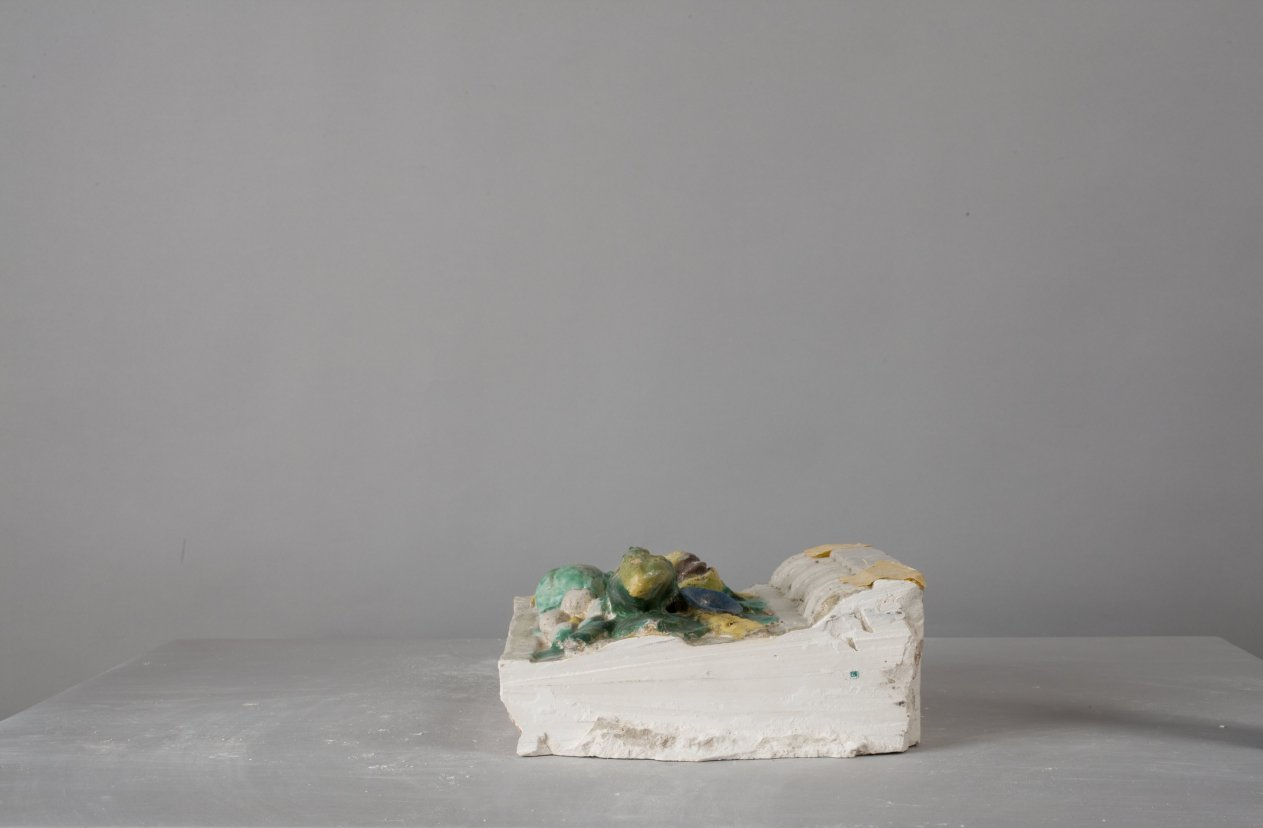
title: Fragment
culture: Italy, Florence, 16th century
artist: Benedetto Buglioni (Italian, 1461–1521)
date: c. 1900–1910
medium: glazed terracotta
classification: Sculpture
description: The Madonna sits upon a throne with the Christ Child standing on her knee. He is steadied by his mother, turning delicately to grasp the Virgin's robe for support. On the left is St. Francis, identified by his stigmata. On the right, St. Anthony Abbot is identified by his monk's robe and T-shaped walking stick. The brown robes of the saints, the purple of the Virgin's tunic (a shade characteristic of the artist), and the flesh tones of the figures contrast strongly against the bright blue background. In the semicircular sky behind the figures, three winged cherub heads emerge, representing a host of angels. The inclusion of St. Francis in this altarpiece honors the saint, suggesting that the altarpiece may have been originally built into the wall of a Franciscan institution in Tuscany. Two shields bearing the Borgherini family crest appear in the lower portion of the altarpiece's border, further suggesting that the chapel for which this altarpiece was made was likely owned or endowed by the family. Glazed terracotta is both durable and decorative and the gleaming white of this piece would have stood out in the darkness of a church. The medium was made popular by Renaissance artist Luca della Robbia and came into fashion as a substitute for expensive carved marble. A rounded arch frame embellished with fruit and flower garlands as well as egg-and-dart and cord moldings accompanied the work when it was acquired, but was later determined not to be original and removed. Buglioni's work bears the influence of the della Robbias, particularly in the simple color scheme. Buglioni likely worked in the studio of Luca's nephew, Andrea, where he would have learned the technique of glazing terracotta.